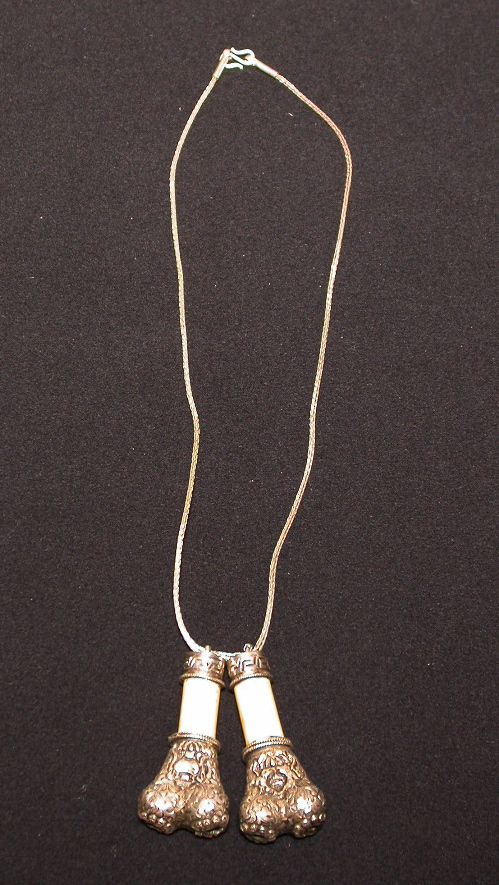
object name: Religious/Ritual Object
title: Two Miniature Bone Trumpets on a Chain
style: Himalayan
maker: Tibet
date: 18th century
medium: Bone and silver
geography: Tibet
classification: jewelry; silver; metal; asian art; ritual objects